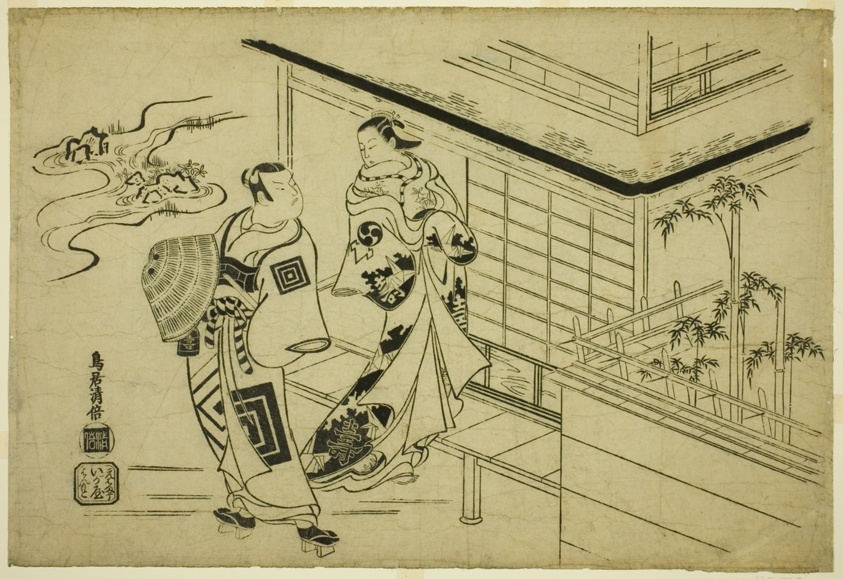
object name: Print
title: The Actors Nakamura Takesaburō as Kewaizaka no Shōshō and IchikawaDanjurō II as Soga Gorō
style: Japanese (culture or style)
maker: Torii Kiyomasu I (Japanese, active 1704–18)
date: 1715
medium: Woodblock print; ō-ōban yoko-e, sumizuri-e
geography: Japan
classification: woodblock print; print; woodblock